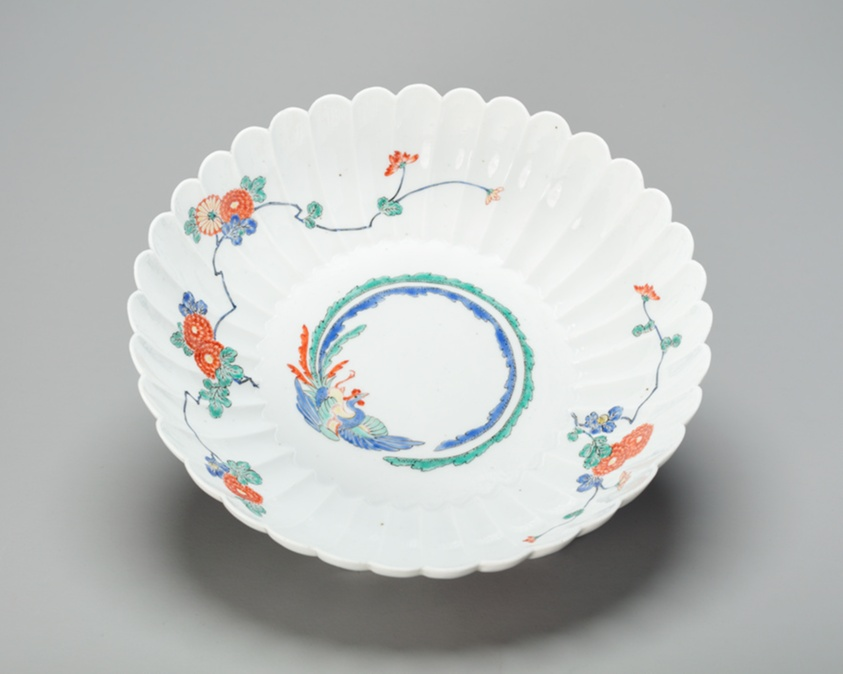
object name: Vessel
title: Arita Ware Kakiemon Floral-shaped Bowl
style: Japanese (culture or style)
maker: Japan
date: late 17th/early 18th century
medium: Porcelain with enamel decoration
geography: Japan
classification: bowl; porcelain; dish (vessel); asian art; ceramics; vessel